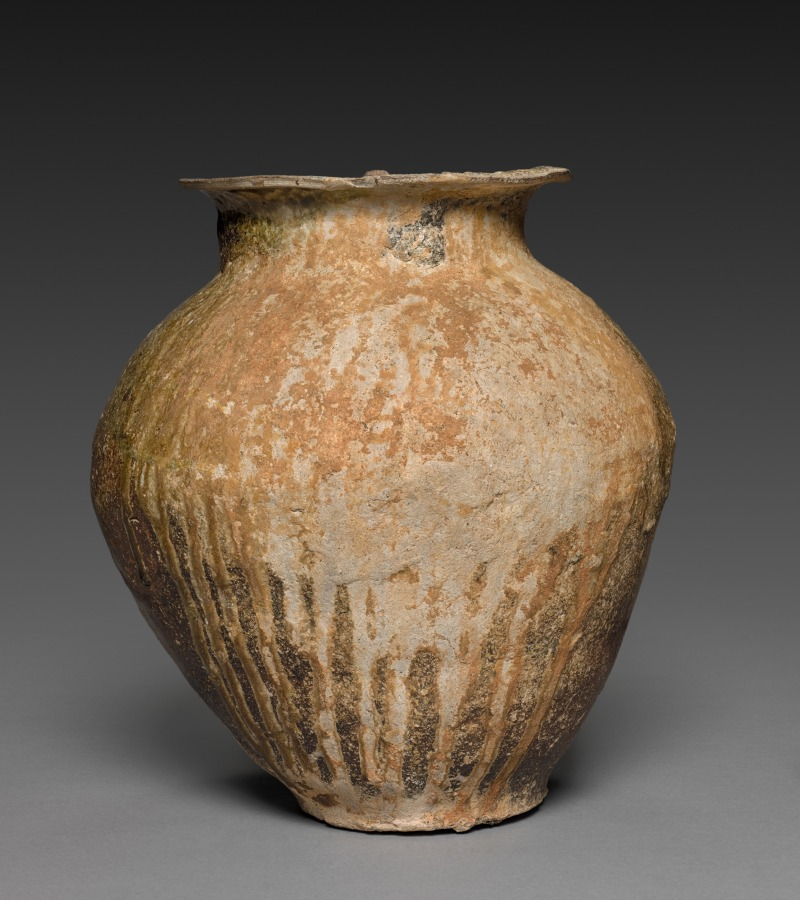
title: Storage Vessel: Tokoname Ware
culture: Japan, Heian period (794–1185)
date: 1100s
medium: stoneware with natural ash glaze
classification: Ceramic